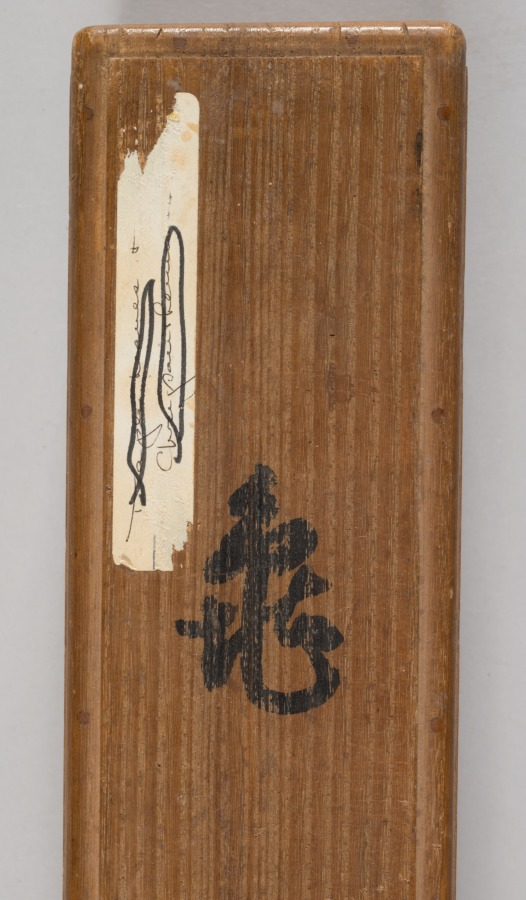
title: Turtle in a Lotus Pond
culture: Japan, Edo period (1615–1868)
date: 1700s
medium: hanging scroll; ink on paper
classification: Painting